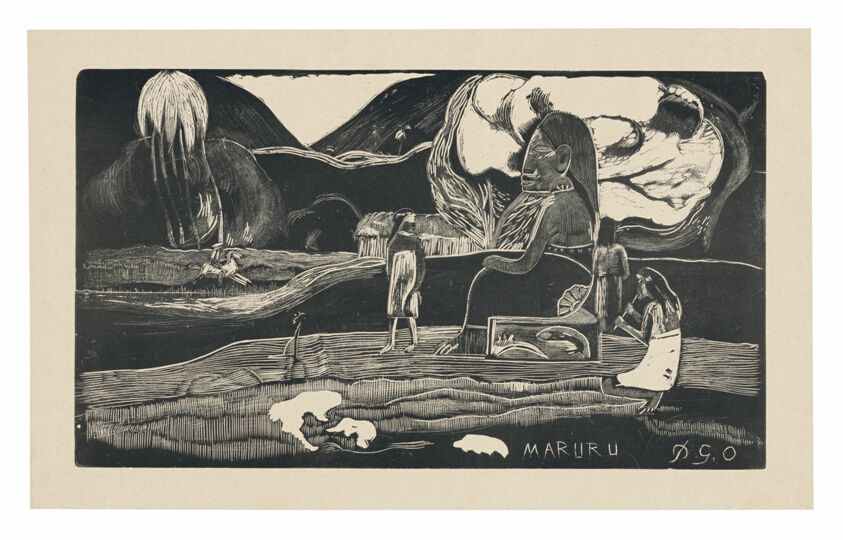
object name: Print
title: Maruru (Offerings of Gratitude), from the Noa Noa Suite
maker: Paul Gauguin (French, 1848-1903); printed by Max Kahn (American, born Russia, 1902-2005)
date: 1893/94, printed 1941/42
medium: Wood-block print, printed in black ink on cream wove paper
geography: France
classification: woodcut; print; prints and drawing